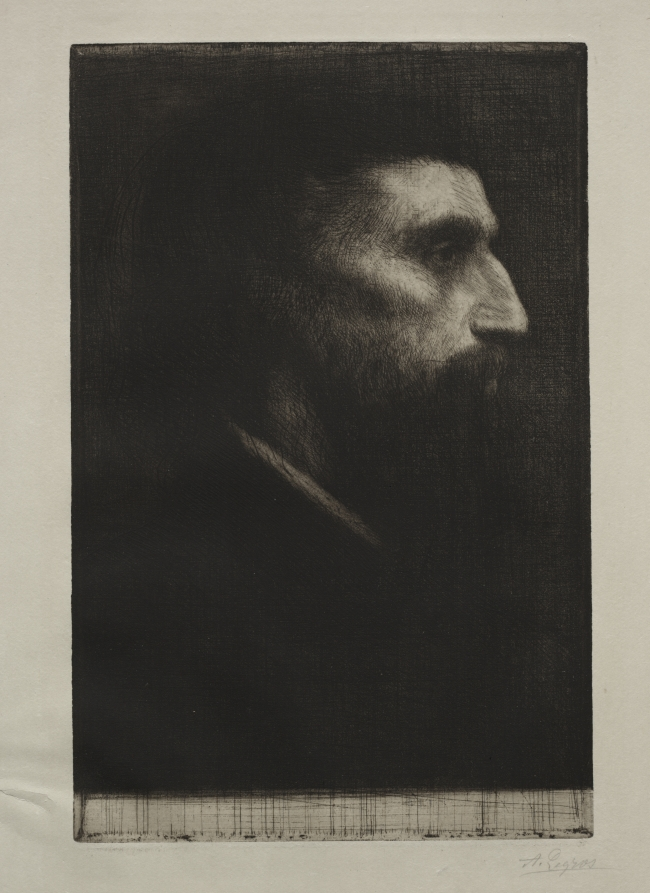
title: Head of a Man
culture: France, 19th century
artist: Alphonse Legros (French, 1837–1911)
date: c. 1857–1911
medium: etching and aquatint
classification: Print